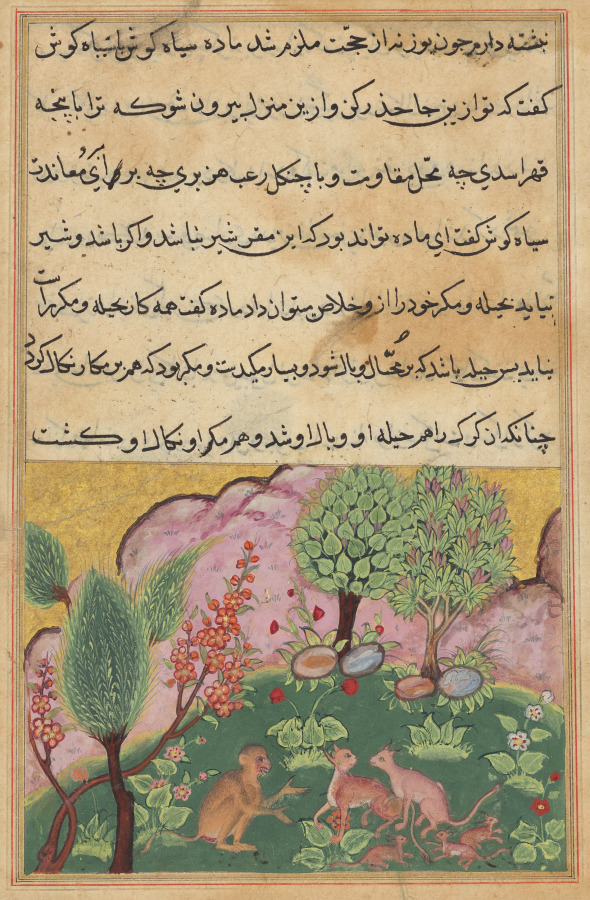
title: The monkey, serving as the lion’s chamberlain, converses with the lynx and its mate who have arrived with their cubs to settle in the lion’s domain, from a Tuti-nama (Tales of a Parrot): Twenty-ninth Night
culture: Mughal India, court of Akbar (reigned 1556–1605)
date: c. 1560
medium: gum tempera, ink, and gold on paper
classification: Painting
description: While the lion is away, the monkey is put in charge of protecting his land. However, a family of lynx soon move into the lion’s den, claiming that they are the rightful owners. The text depicts the lion’s home as a beautiful meadow with a field of tulips.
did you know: The artist has faithfully rendered the distinctive tufts on the ears of all five lynxes.